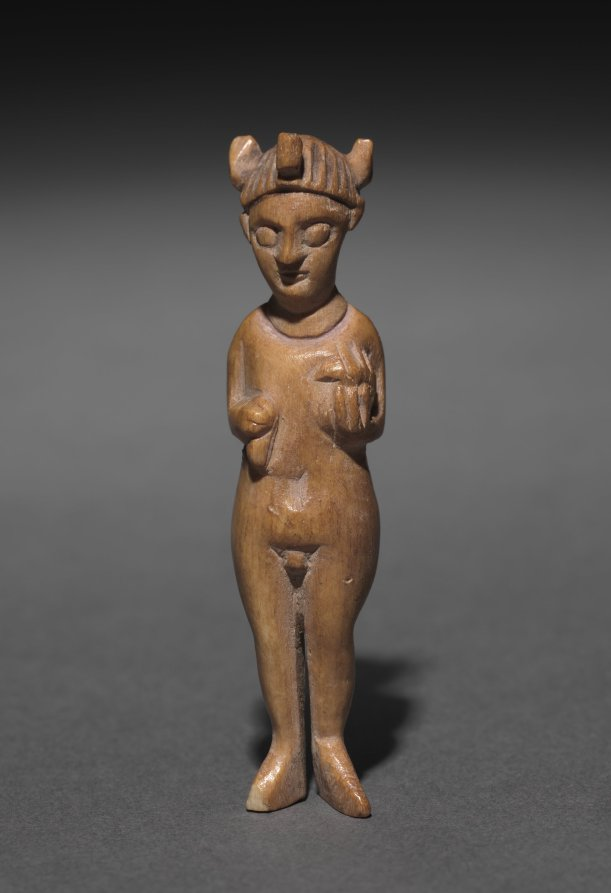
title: Figurine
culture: Parthian Empire (247 BCE–224 CE)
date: 1–200 CE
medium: bone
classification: Sculpture